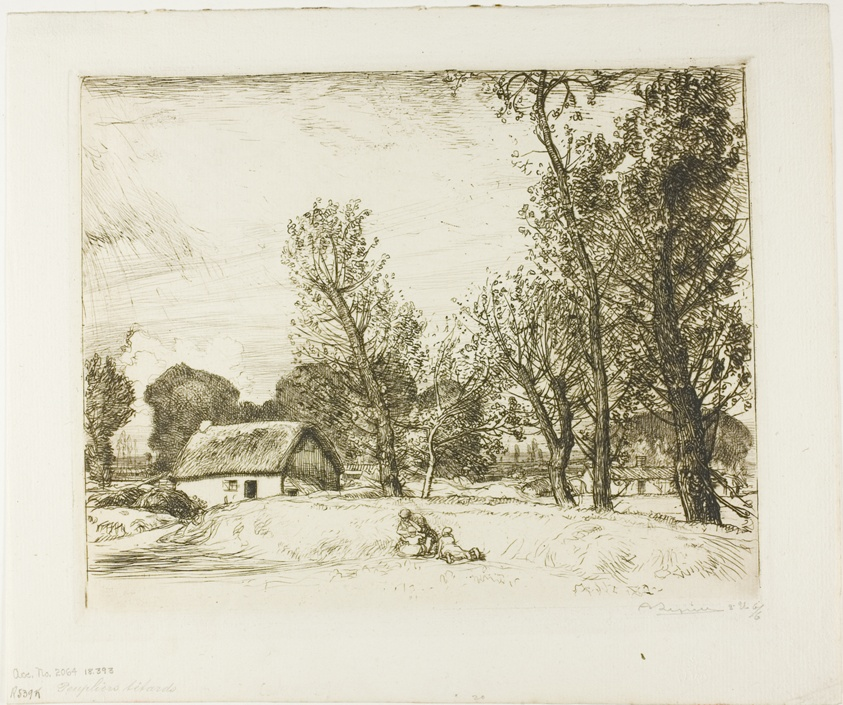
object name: Print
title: Pollard Poplars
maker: Louis Auguste Lepère (French, 1849-1918)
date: 1910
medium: Etching in bistre on cream laid paper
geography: France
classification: etching; print; prints and drawing